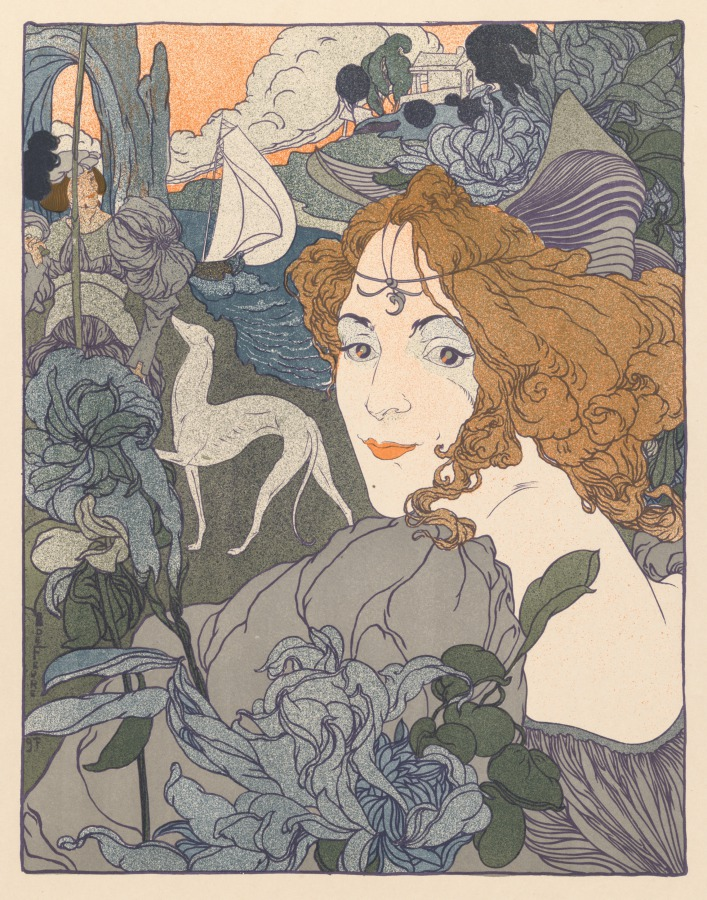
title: Retour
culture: France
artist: Georges de Feure (French, 1868–1943)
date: 1897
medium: color lithograph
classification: Print